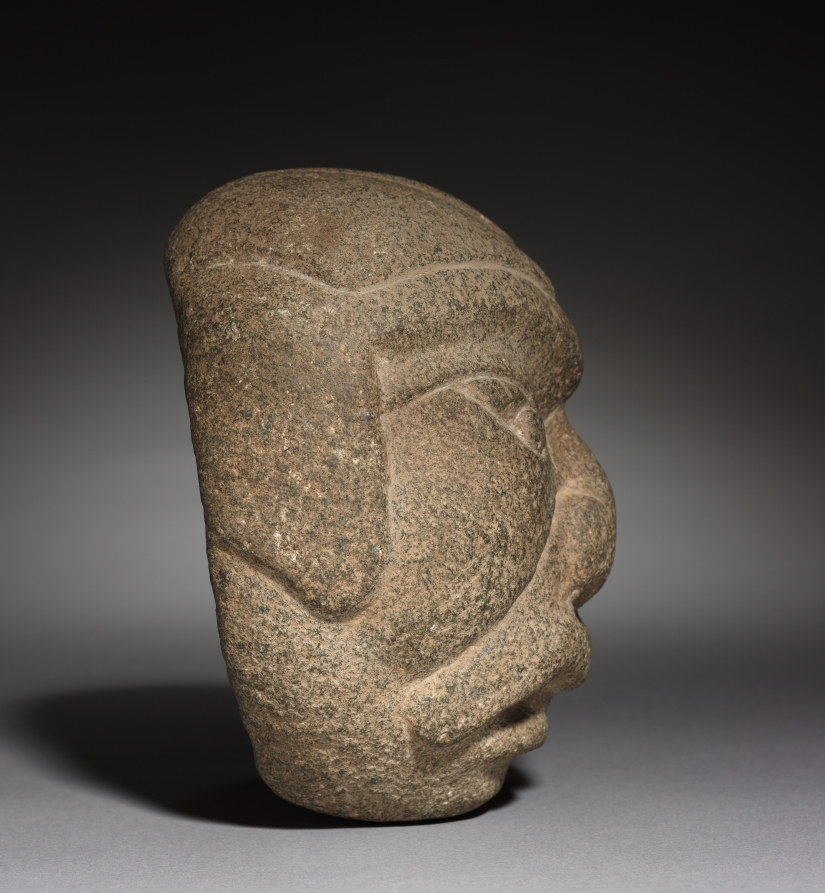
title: Head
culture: Mesoamerica, Mexico, Olmec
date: 1200–300 BCE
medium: stone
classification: Sculpture